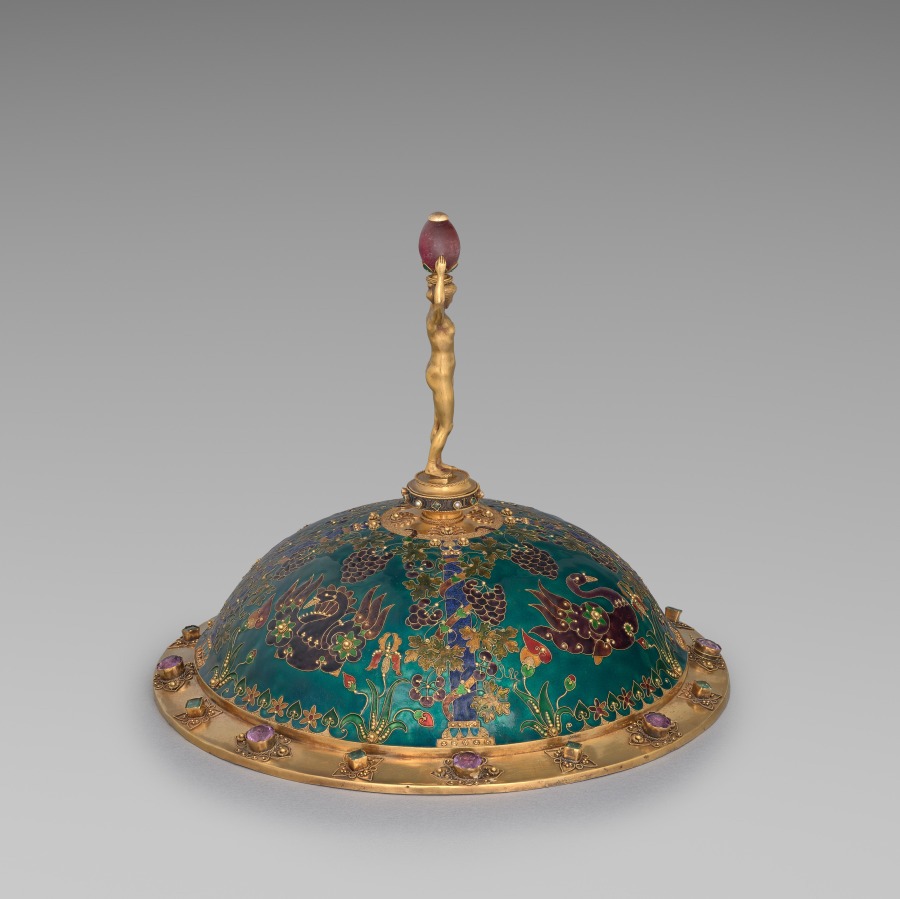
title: Cover for a Cup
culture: France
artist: Armand Point (French, 1861–1932)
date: c. 1897–99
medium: amethyst, silver-gilt, cloisonné enamel, aquamarine, rubies, malachite, lapis lazuli, pearls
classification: Metalwork